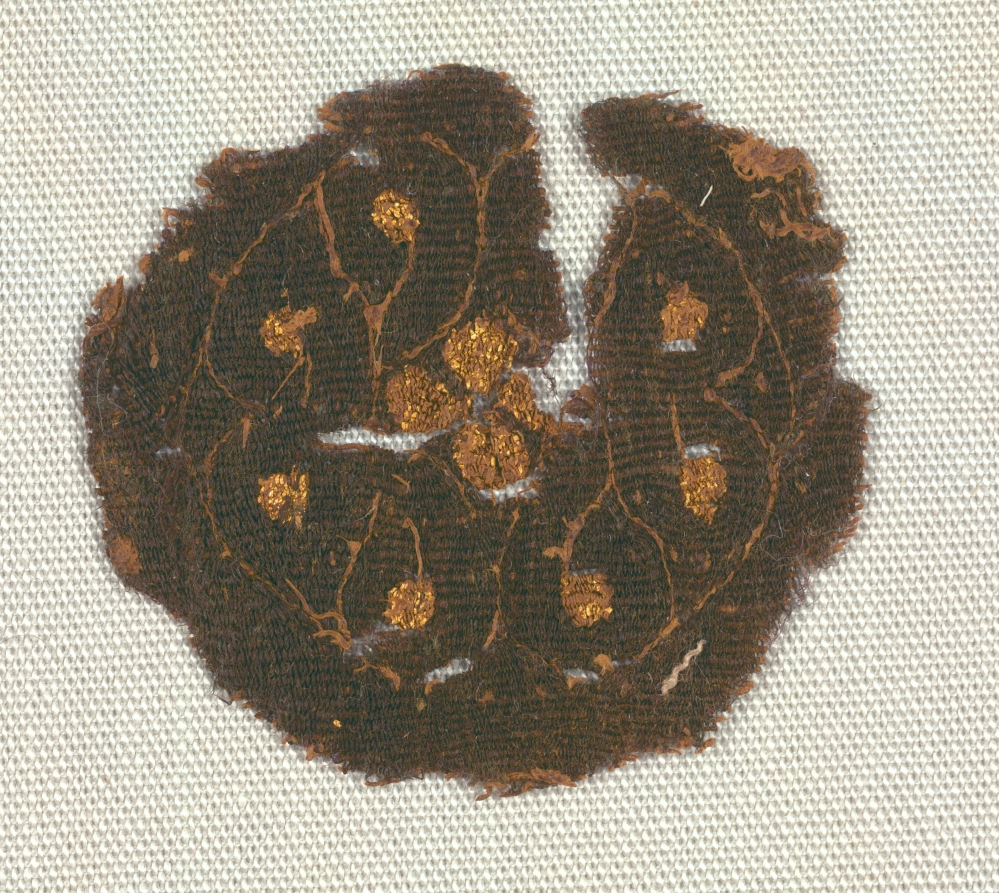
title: Round Segmentum from a Tunic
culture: Egypt, Byzantine period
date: 300s–400s CE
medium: tapestry (probably inwoven in tabby ground); wool, linen, and gold foil around silk core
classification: Textile